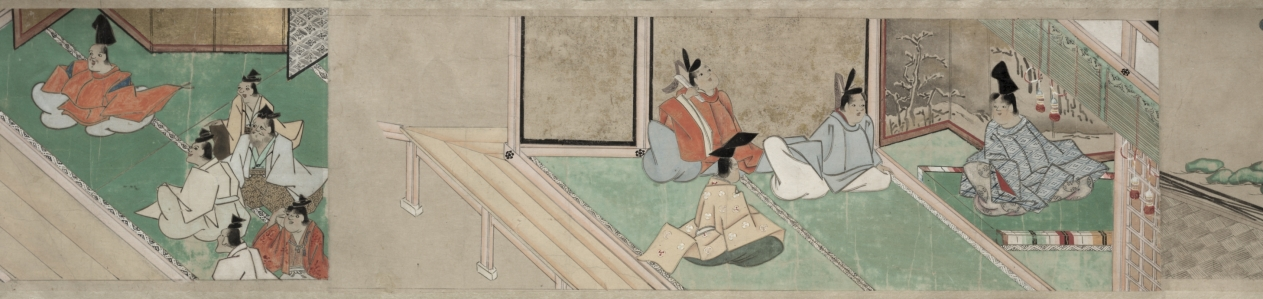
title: The Saltmaker's Story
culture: Japan, Edo period (1615–1868)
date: early 1600s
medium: One of a pair of handscrolls; ink, color, and gold on paper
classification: Painting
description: Once read and copied by girls at New Year’s celebrations and included in dowries, The Saltmaker’s Story is a rags-to-riches tale in which daughters are gifts from the gods. Despite his simple outlook, the main character progresses from humble roots as an associate at Kashima Shrine to the elite status of grandfather of the emperor through the intervention of the Kashima deity. The Saltmaker’s Story is traditionally presented in a set of three scrolls, but the text of this set has been removed by a previous owner, who remounted the illustrations as a pair. The paintings of this one take us from right to left through the first half of the tale.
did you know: This handscroll originally had texts before its paintings, but the texts were removed.